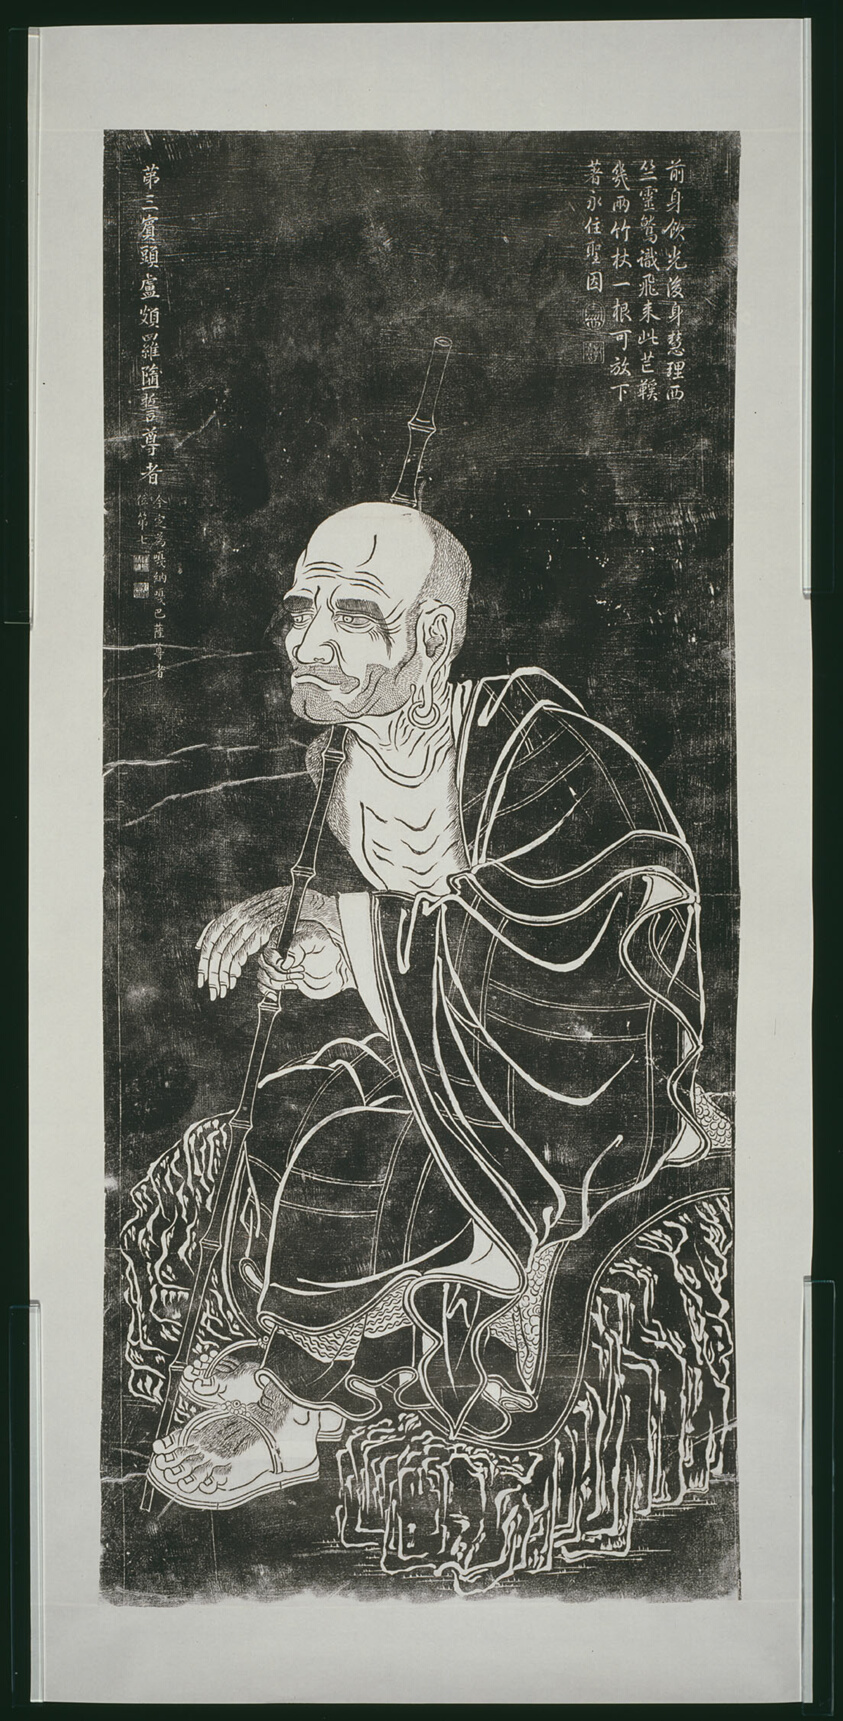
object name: Painting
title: Luohan: Pindola Bharadvaja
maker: Artist unknown, after Guanxiu (Chinese, 832-912)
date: Qing dynasty (1644-1911), stone engraving 1757; rubbing 19th century?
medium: Ink rubbing on paper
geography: China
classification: rubbing; asian art